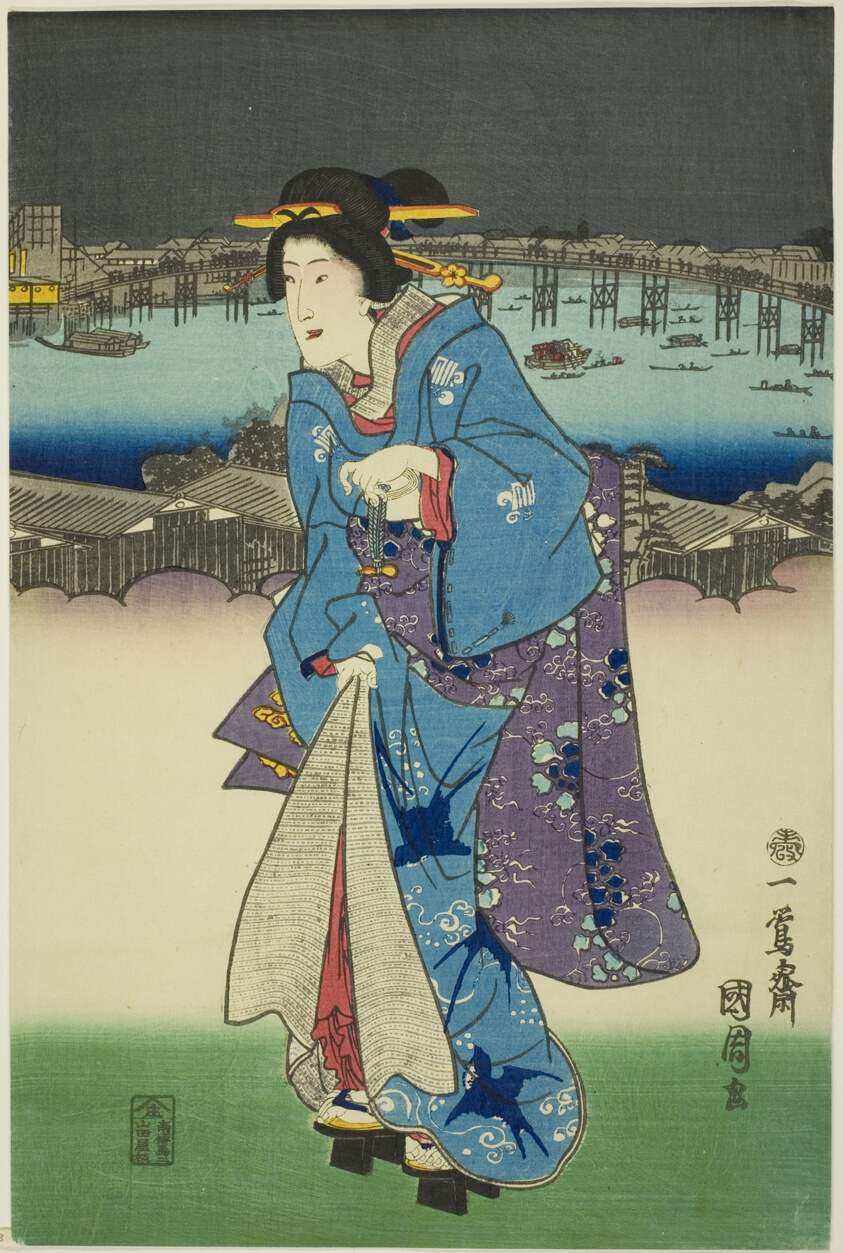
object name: Print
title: Evening Amusements at Ryogoku in the Eastern Capital (Toto Ryogoku yoasobi no zu)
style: Japanese (culture or style)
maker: Toyohara Kunichika (Japanese, 1835-1900)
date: 1859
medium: Color woodblock print; right sheet of oban triptych (left: 1939.1764)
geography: Japan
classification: print; asian art